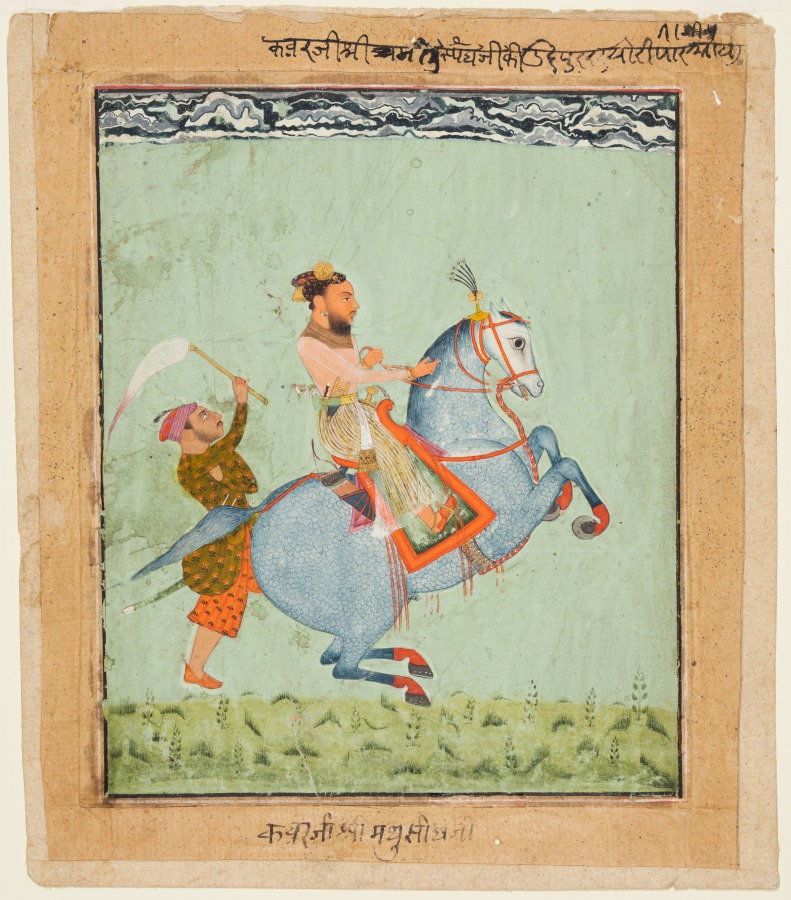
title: Prince Mathu Singh of Jatoli on a Blue Horse Riding to Udaipur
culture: Northwestern India, Rajasthan, Rajput Kingdom of Mewar or Jatoli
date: c. 1720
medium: gum tempera, ink, and gold on paper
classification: Painting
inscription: [[recto, upper margin]] kavarajī śrī matu [?] siṃgha jī kī udaipura suyorī pāra āye nila [[above, correction, crossed out]] [?]jīma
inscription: [[recto, lower margin]] kavara jī śrī mathu sīṃgh jī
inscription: [[verso, upper center]] jatolī ko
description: This painting commemorates the nearly 600-kilometer journey of Mathu Singh on horseback from the tiny principality of Jatoli in eastern Rajasthan to Udaipur, capital of the powerful Mewar Kingdom. The young prince wears a white transparent muslin, and his stallion rears on his hind legs, marking the beginning of the ride. A heedful royal servant gently waves a fly-whisk, which indicates the rider’s royal status.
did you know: The prince travels armed with bow and arrows, sword, and dagger.